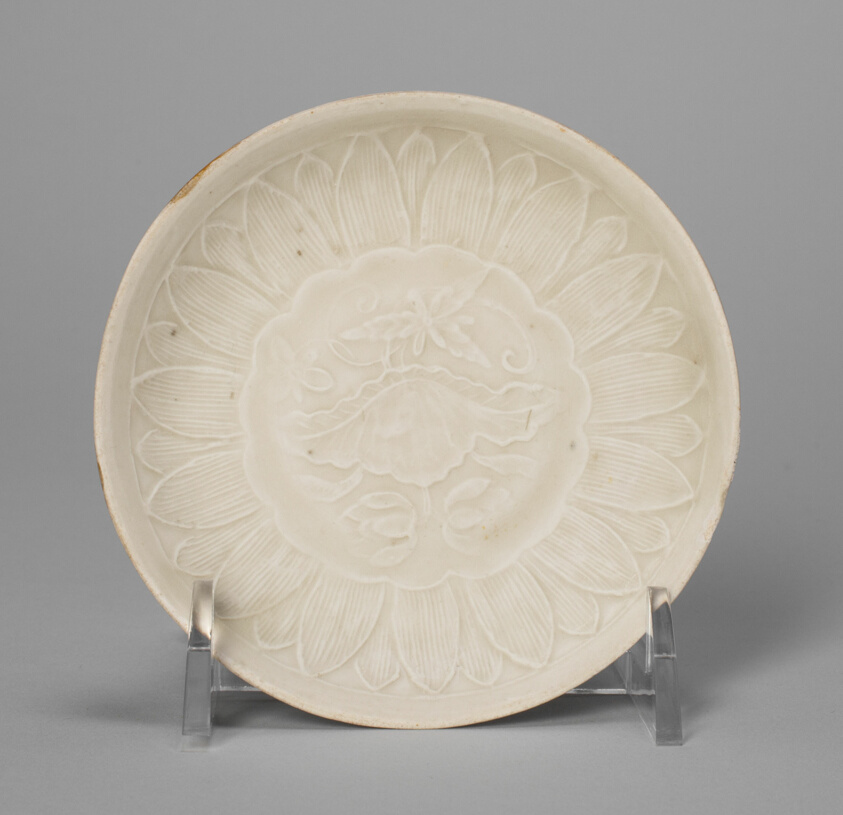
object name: Vessel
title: Dish with Lotus Flower and Petals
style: Chinese (culture or style)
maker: China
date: Song dynasty (960–1279)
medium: Stoneware with underglaze molded and carved decoration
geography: China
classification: dish (vessel); asian art; ceramics; vessel